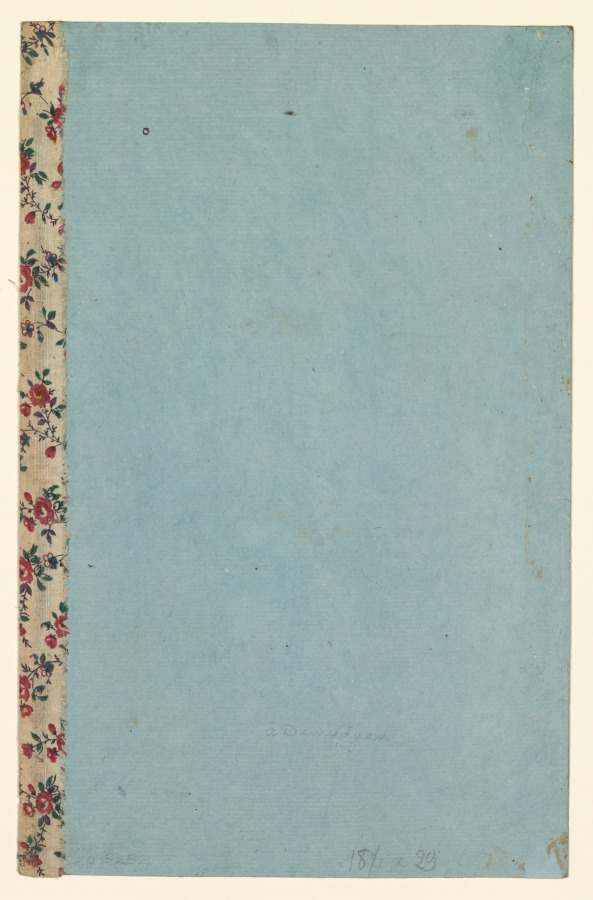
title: A prince riding a composite elephant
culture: India, Golconda, Deccan, 16th century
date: c. 1590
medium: Gum tempera, ink, and gold on paper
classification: Painting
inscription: Inscriptions: Calligraphy of Persian verses in top and bottom borders, in nasta‘liq script: Central verse (half-line on top, the other below the elephant’s feet): Given the foretold lackluster fortune of this abject servant Nothing is writ save words of your bounty Diagonal verses on top: The angelic beauties of paradise with their anxious dark-eyes set on the road Their glances throwing gold coins on the path (as a welcome) Diagonal verses below: The glittering full face of the sun is no more than a single drop From the perspiration behind his ear.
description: A prince sits cross-legged in a covered howdah seat secured to the back of a royal elephant with golden rings on its tusks. The elephant is being driven by attendants, one of whom holds a goad. Artists in the southern Indian region known as the Deccan expanded upon Persian practices of embedding creatures in landscape scenes—like a visual double-entendre—and created inventive images of composite creatures made up of figures that invite extended close looking. This painting would have been mounted in an album that was brought out for entertainment in elite intimate gatherings.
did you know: Two lions share one head at the top of the elephant’s head.